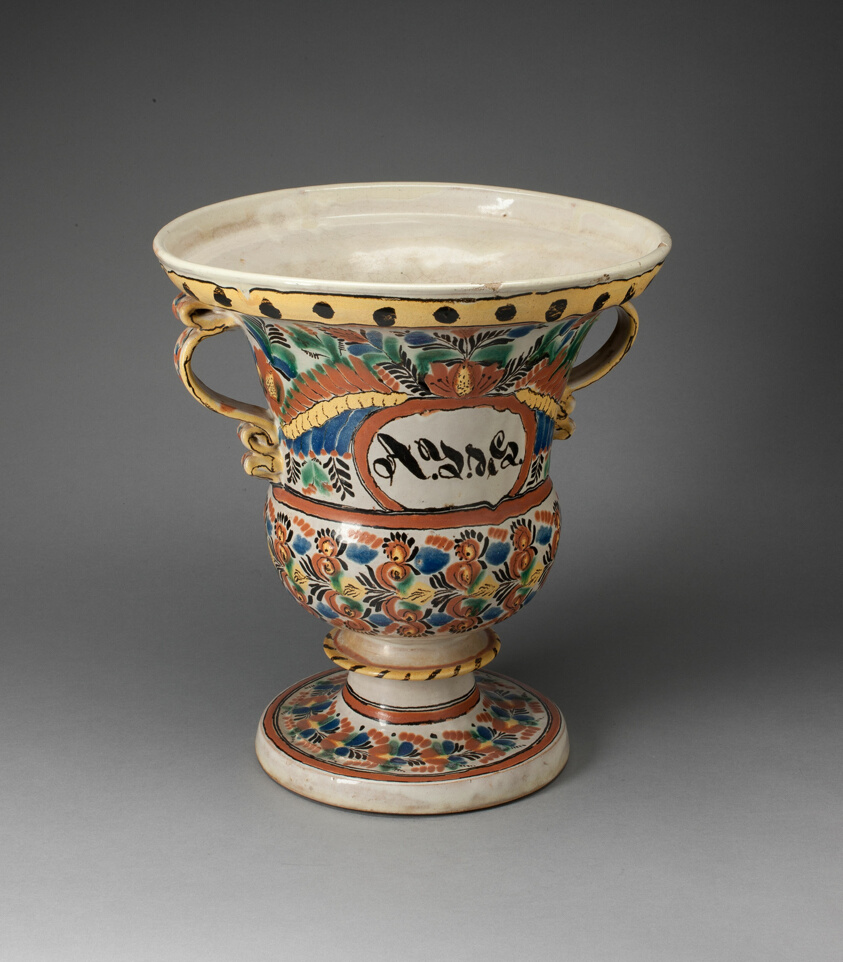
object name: Vessel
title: Two-Handled Jardiniere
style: talavera, Arts of the Americas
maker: Talavera poblana; Puebla, Mexico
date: 1825–1875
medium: Tin-glazed earthenware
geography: Puebla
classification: jardinière; container; ceramics; earthenware; vessel; art of the americas